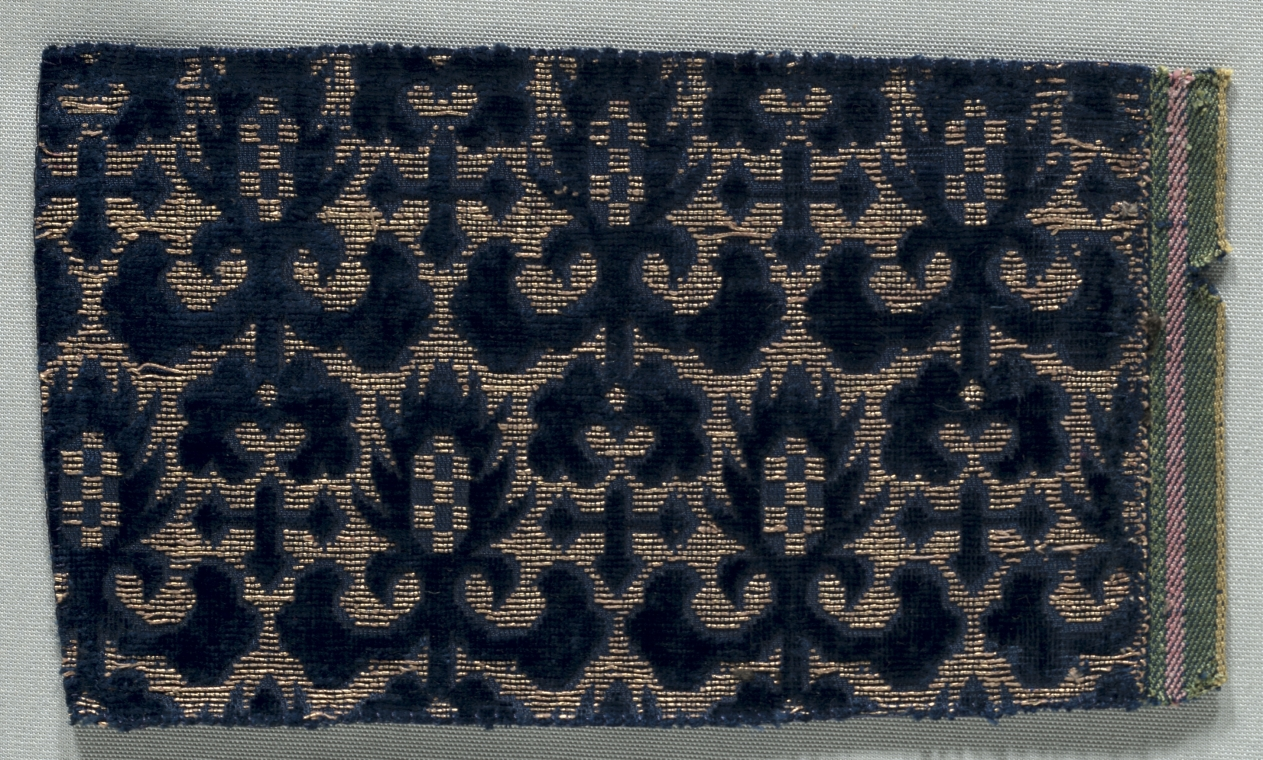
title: Velvet Fragment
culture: Italy, 17th century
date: 1600s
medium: velvet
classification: Velvet